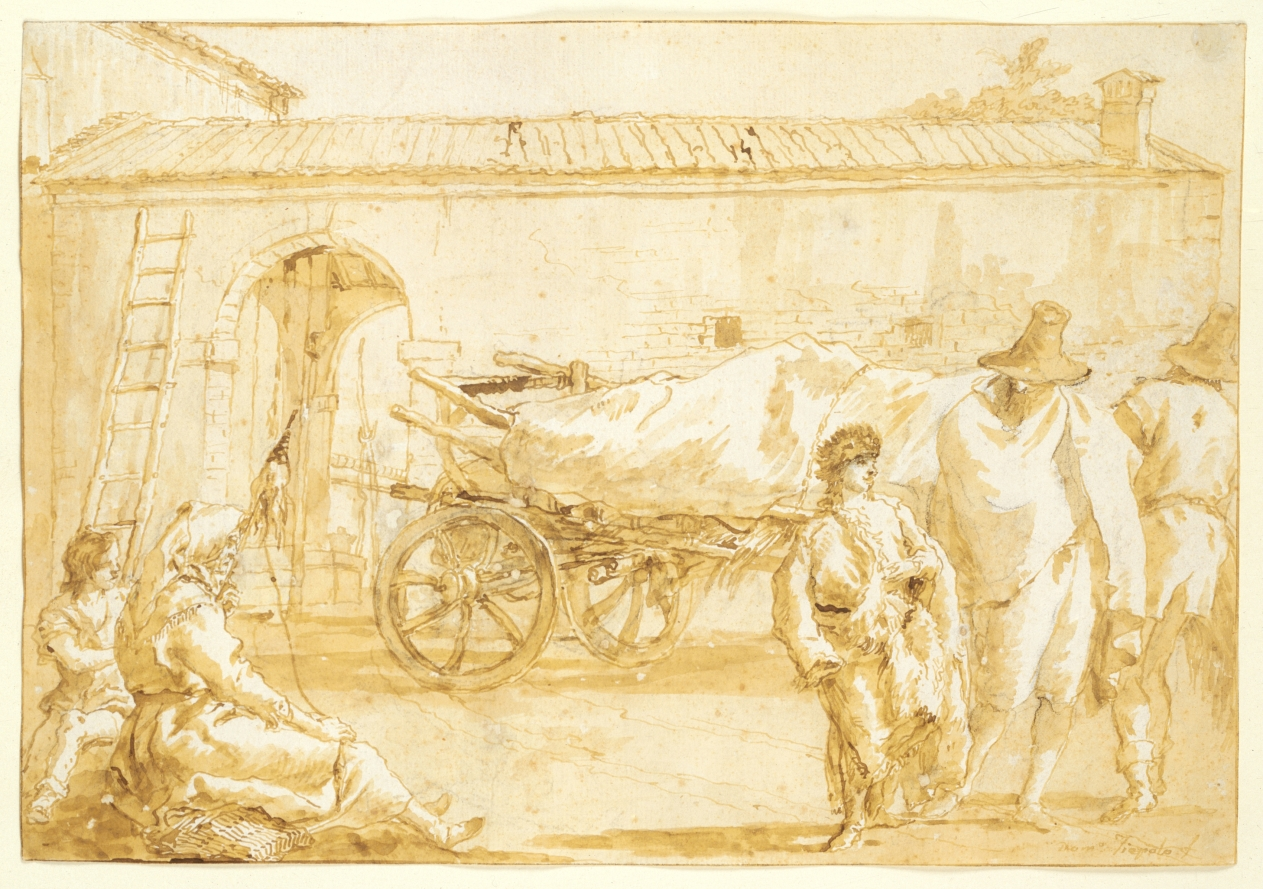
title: Peasants with a Farm-cart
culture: Italy, 18th century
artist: Giovanni Domenico Tiepolo (Italian, 1727–1804)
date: c. 1790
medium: pen and brown ink and brush and brown wash over black chalk; framing lines in brown ink over black chalk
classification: Drawing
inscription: signed, bottom right, in brown ink: Dom°. Tiepolo f ; VERSO, upper left, in black chalk: [S?] ; center, in graphite: 18 . [underlined] ; center, in black chalk: 18 [upside down] ; lower left, in brown ink: 4